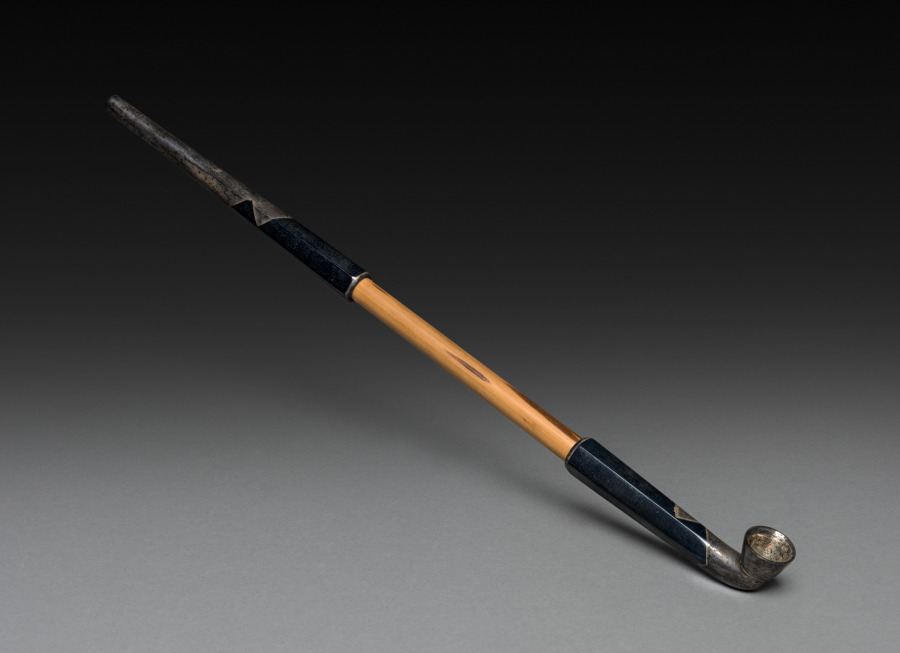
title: Tobacco Pipe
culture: Japan, Edo period (1615–1868)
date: 1700s to mid-1800s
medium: bamboo and metal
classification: Miscellaneous